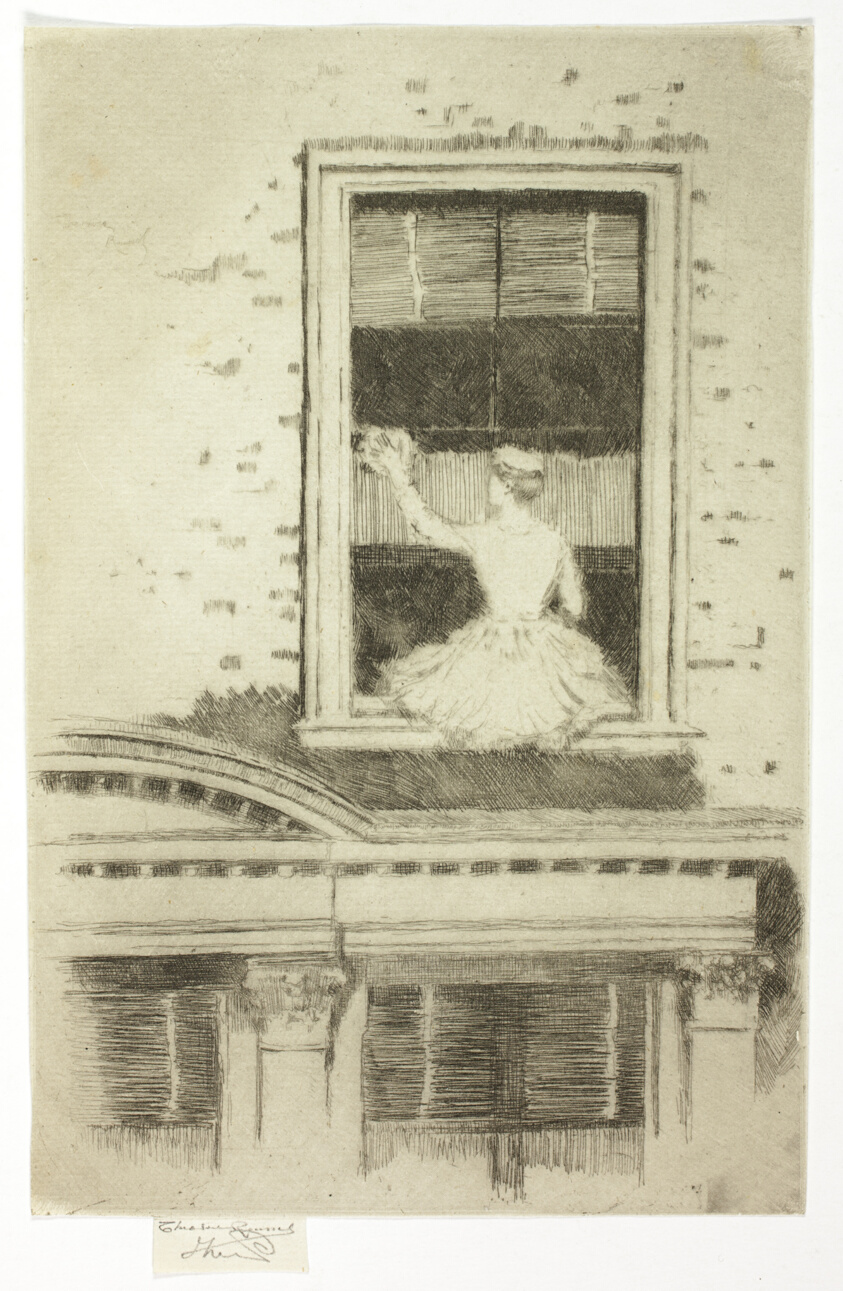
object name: Print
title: The Window Cleaner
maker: Theodore Roussel (French, worked in England, 1847-1926)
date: 1889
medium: Etching in black on ivory laid paper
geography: England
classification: etching; paper; print; prints and drawing